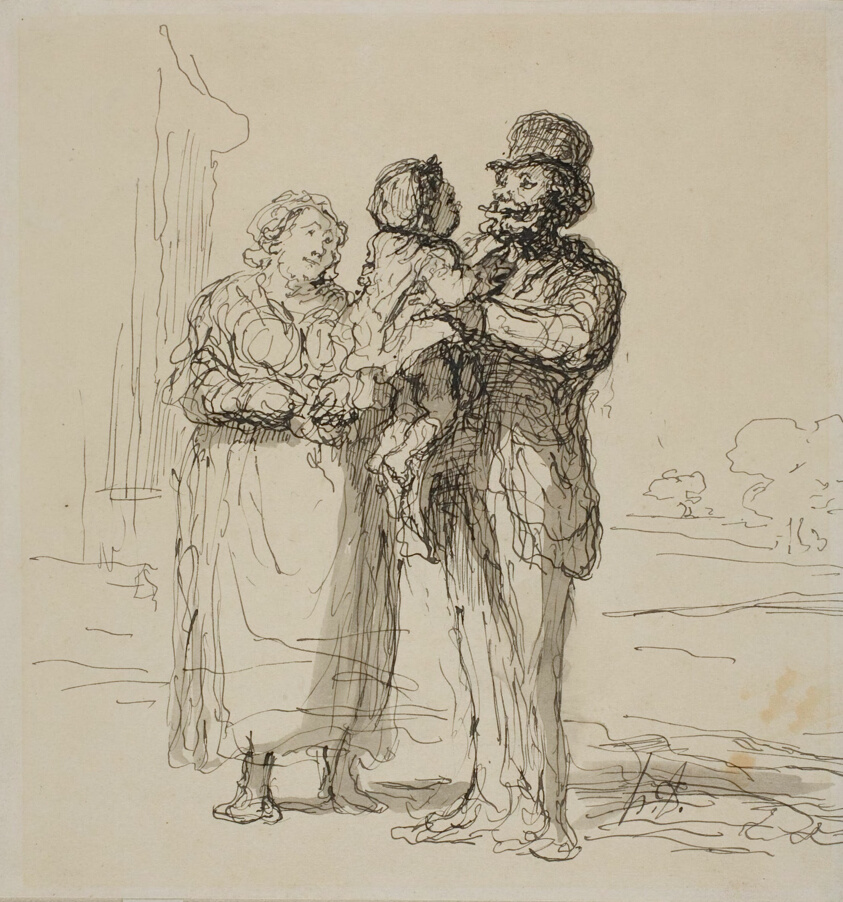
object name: Drawing and Watercolor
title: Family Scene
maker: Honoré Victorin Daumier; French, 1808-1879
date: c. 1865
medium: Pen and black ink, brush and gray wash, on ivory wove paper (discolored to cream)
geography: France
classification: pen and ink drawings; drawings (visual works); prints and drawing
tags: children